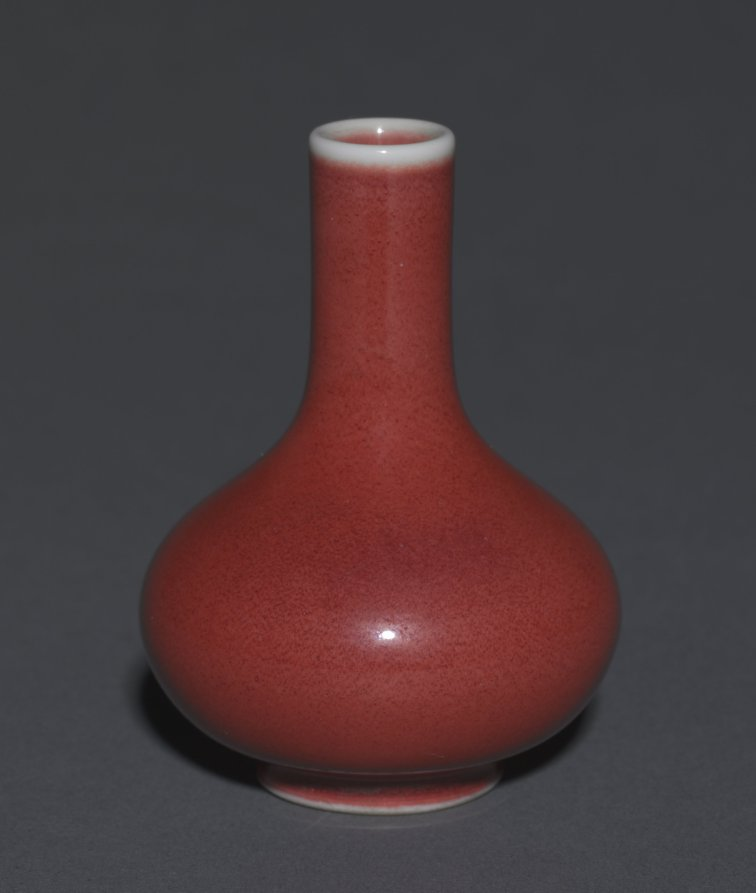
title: Bottle Vase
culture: China, Qing dynasty (1644-1911), Kangxi reign (1662-1722)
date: 1662–1722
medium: porcelain, Lang ware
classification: Ceramic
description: In the Qing dynasty (1644–1911), luxury items became more affordable to larger parts of the society, including women, merchants, and literati in non-official positions. Imperial patronage and a growing urban population encouraged consumption of luxury goods and local craftmanship. This petite, red-glazed bottle vase is an example of Lang ware, or Lang yao in Chinese, developed at the imperial kilns at Jingdezhen. “Ox blood” glaze is one of the Qing dynasty's accomplishments in porcelain production.